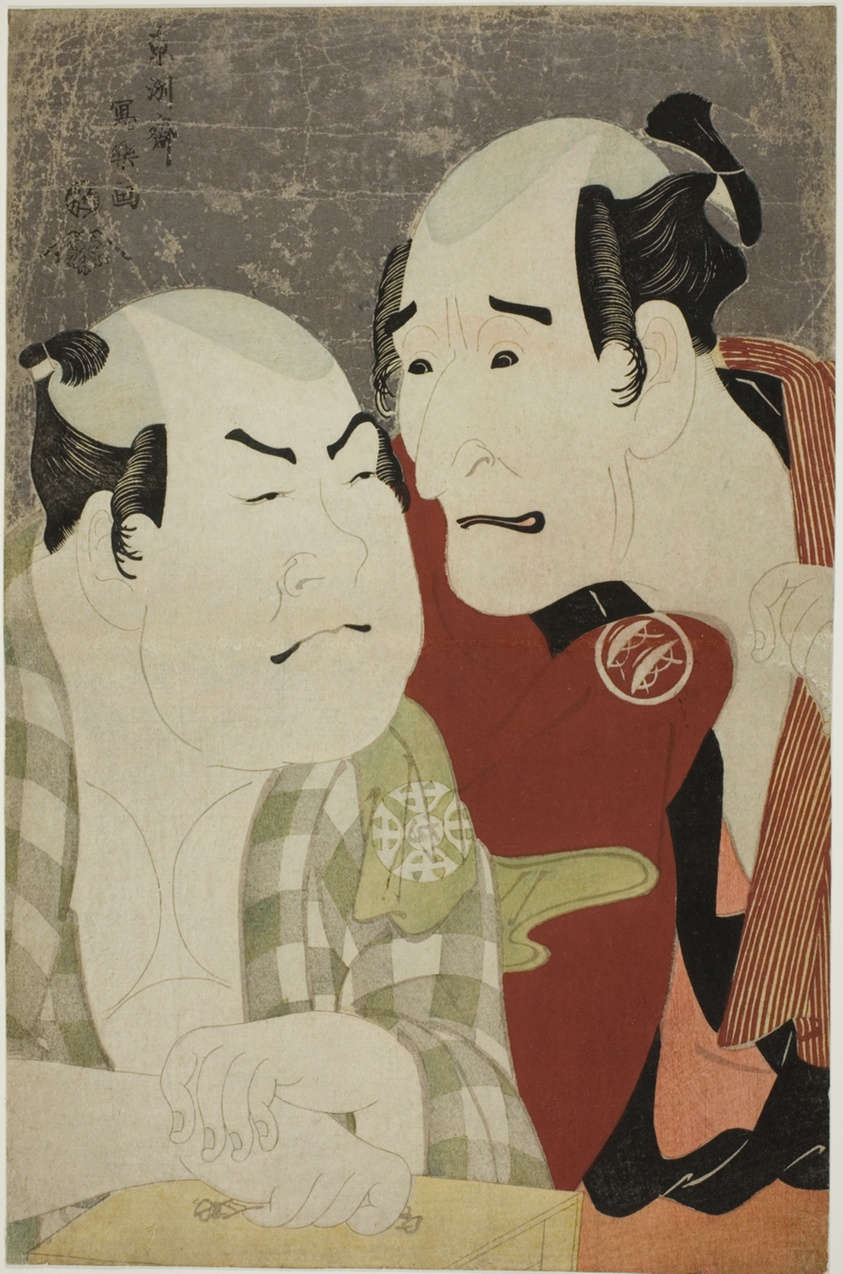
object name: Print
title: The actors Nakajima Wadaemon (R) as Bodara Chozaemon and Nakamura Konozo (L) as Gon of the boat-keeper Kanagawaya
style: Japanese (culture or style)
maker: Toshusai Sharaku 東洲斎 写楽; Japanese, active 1794-95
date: 1794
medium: Color woodblock print; oban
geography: Japan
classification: woodblock print; print; asian art